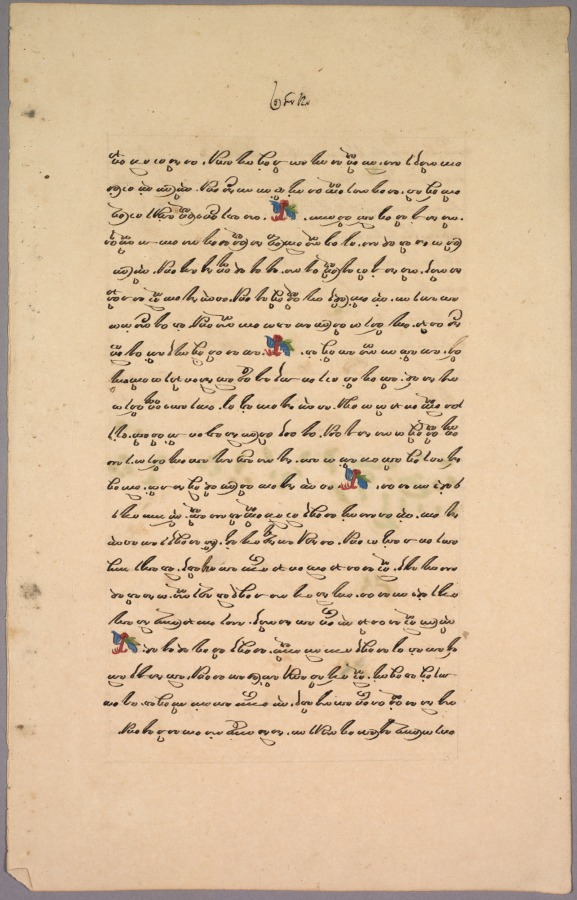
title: Page from Ramayana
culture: Java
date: 1800s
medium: ink on paper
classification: Manuscript